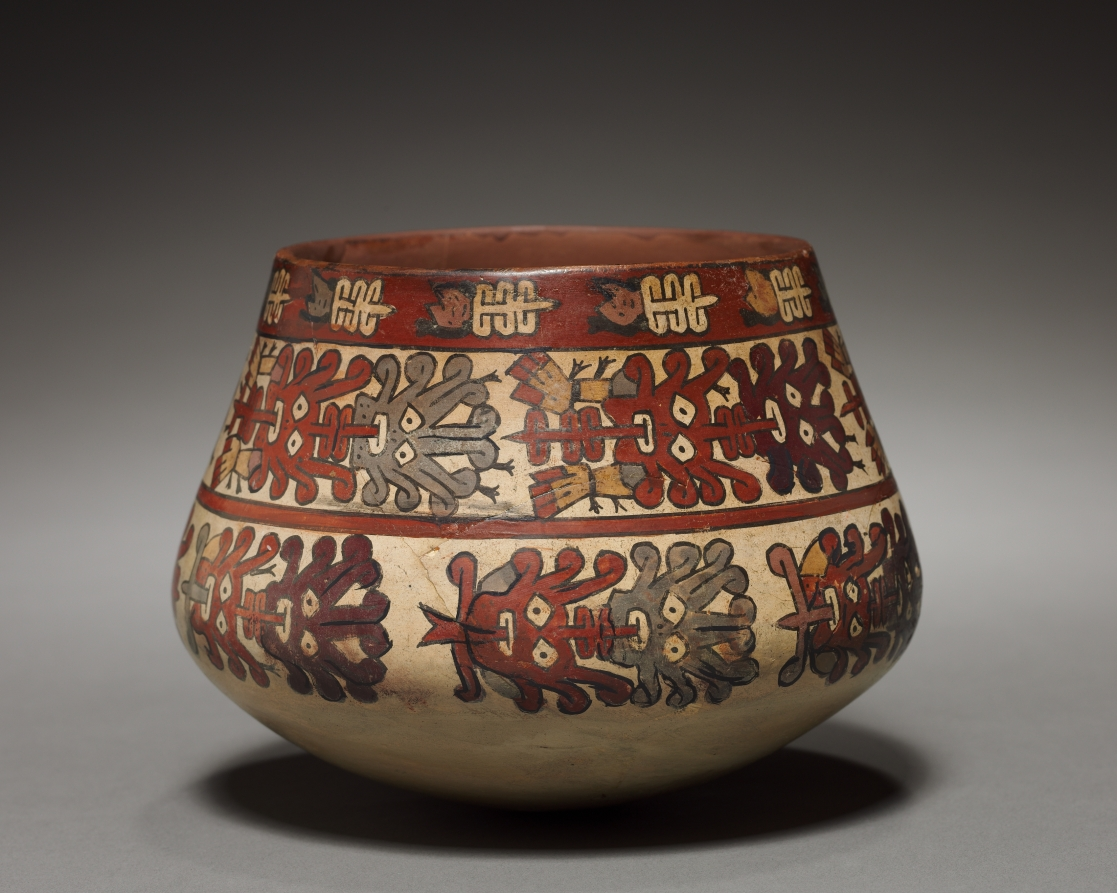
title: Vessel with Abstract Heads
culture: Peru, South Coast, Nasca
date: 100 BCE–700 CE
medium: earthenware with colored slips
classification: Ceramic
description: Late Nasca supernatural depictions became abstract, detailed, and focused on the head. In this vessel's central register, for instance, a deity is reduced to two mask-like faces, edged by volutes and linked by tongues; the only remains of a body are the hands. The lower register carries a similar image, and the upper register has severed human heads.